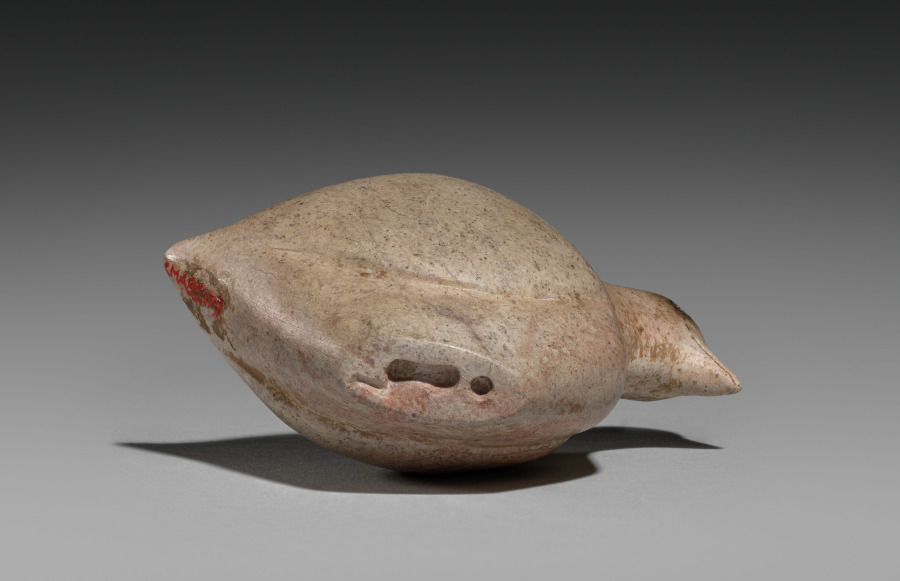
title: Nesting Quail Stamp Seal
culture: Iran, Lake Van region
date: 4000–3000 BCE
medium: dickite stone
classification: Sculpture